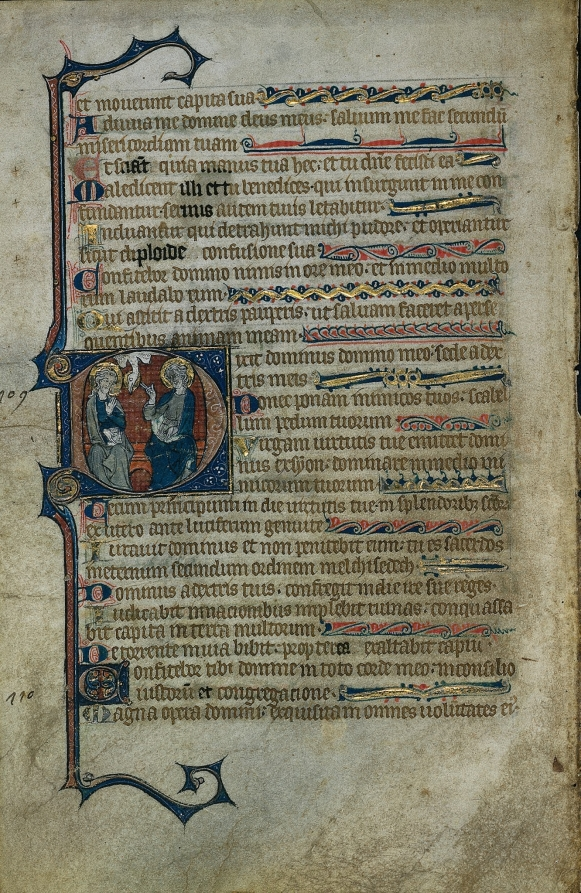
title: Leaf from a Psalter: Historiated Initial D with The Trinity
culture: England, East Anglia, early 14th Century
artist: follower of Master of the Queen Mary Psalter (English)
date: c.1310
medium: ink, tempera and gold on vellum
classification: Manuscript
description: Although English, the design of this psalter page follows the fashion of French book illumination. In particular, the white flesh tones, elegant wavy coiffures, and elongated fingers of the figures relate this leaf to the Queen Mary Psalter, probably the most "Parisian" of all surviving English illuminated manuscripts of the early 1300s. The Queen Mary Psalter is named after the 16th-century English queen who appears to have once owned it. The artistic connections between France and England during this period are puzzling and often show influence moving in both directions. The workshop of the Queen Mary Psalter appears to have been active in East Anglia between 1310 and 1335, though its specific location remains unknown. It presumably competed with workshops in Norwich, Cambridge, Bury St. Edmunds, and the so-called "Fenland" workshops. A large initial D for Dixit dominus domino. . . . (The Lord said unto my Lord. . . . ) introduces the text, the opening of Psalm 109, within which appears the Trinity.